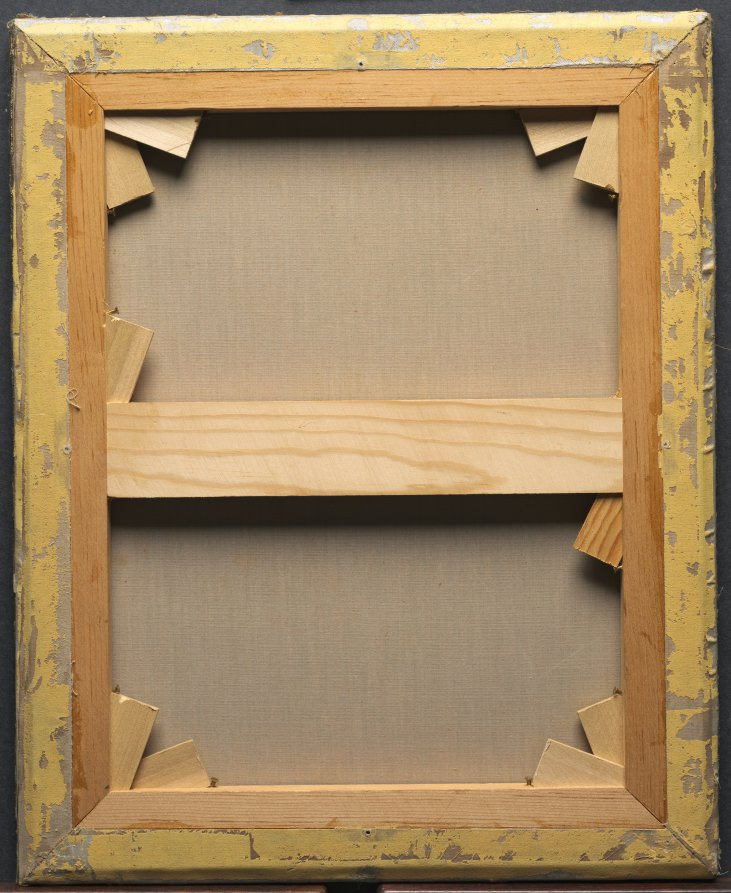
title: Portrait of a Young Man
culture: France, 19th century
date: not dated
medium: oil on fabric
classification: Painting